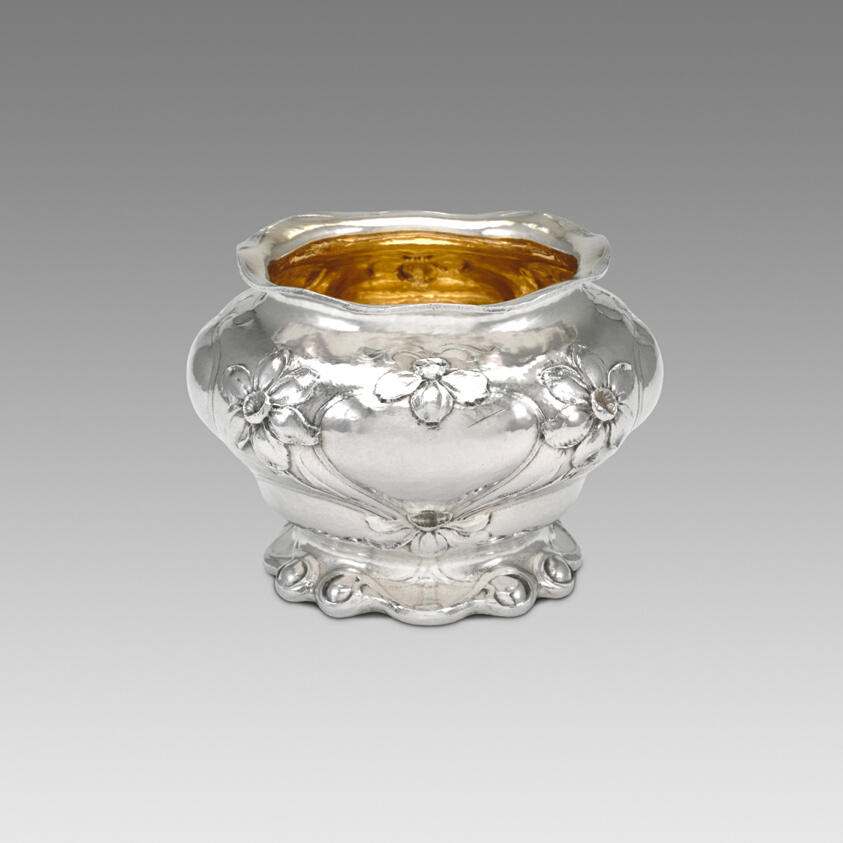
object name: Metalwork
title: Waste Bowl (part of a set)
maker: Gorham Manufacturing Company (American, founded 1831); Providence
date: 1900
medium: Silver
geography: Providence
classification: slop bowl; silver; american decorative arts; american arts; decorative arts